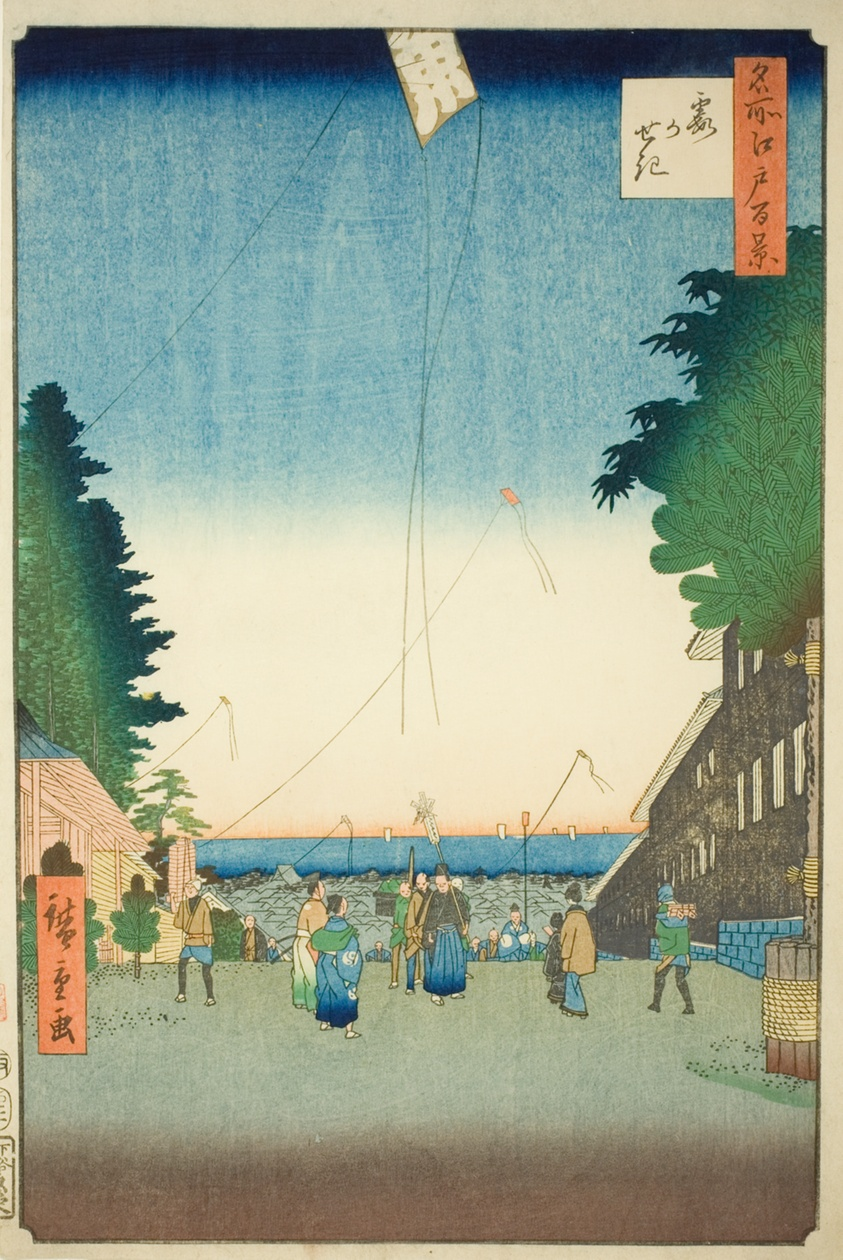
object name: Print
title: Kasumigaseki, from the series "One Hundred Famous Views of Edo (Meisho Edo hyakkei)"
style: Japanese (culture or style)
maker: Utagawa Hiroshige 歌川 広重; Japanese, 1797-1858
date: 1857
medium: Color woodblock print; oban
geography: Japan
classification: woodblock print; print; asian art